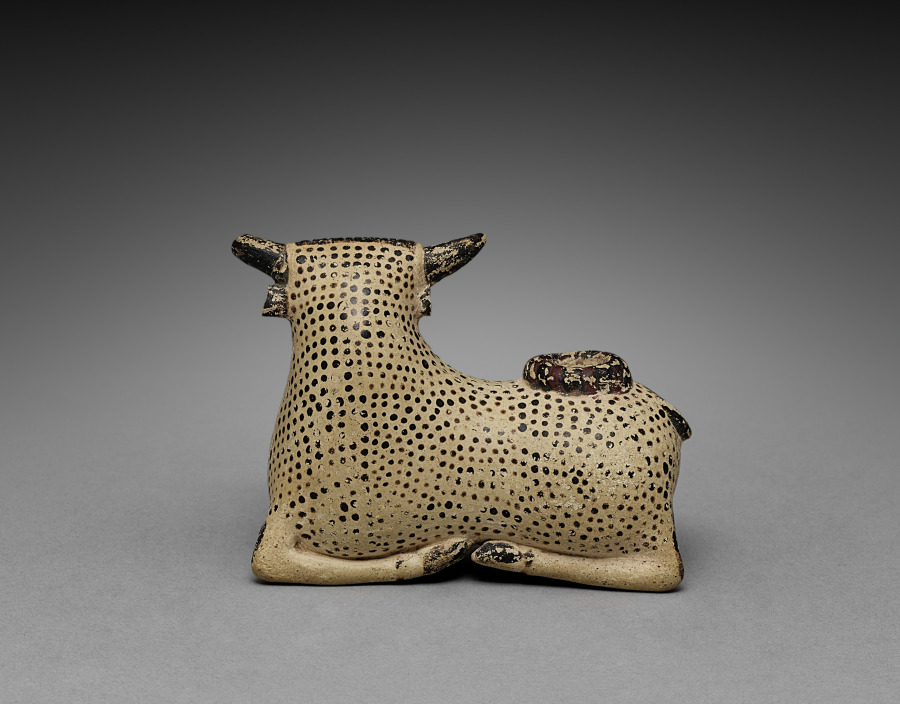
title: Oil Flask in the Shape of a Bull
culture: Greek, Corinthian or modern forgery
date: 600–575 BCE or 1900s CE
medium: ceramic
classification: Ceramic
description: This small bull-shaped flask is similar in form and painted decoration to a class of figure-shaped perfume vessels created during the late seventh and early sixth centuries BC in Greece and Italy (especially Corinth, Rhodes, and Etruria). The stippled body decoration characterizes such vases from multiple sites, while the light-colored clay and inconspicuous orifice placement are typical of Corinth. But no other reclining bulls are known among such vases (and only a few bullheads or upper bodies), raising questions about authenticity. A 1986 analysis determined that this object had been recently fired, and a 2020 clay analysis placed its origin in the Catalonia region of Spain, far from any known ancient production area for such flasks.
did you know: The curled tail masks a filling hole atop the back.